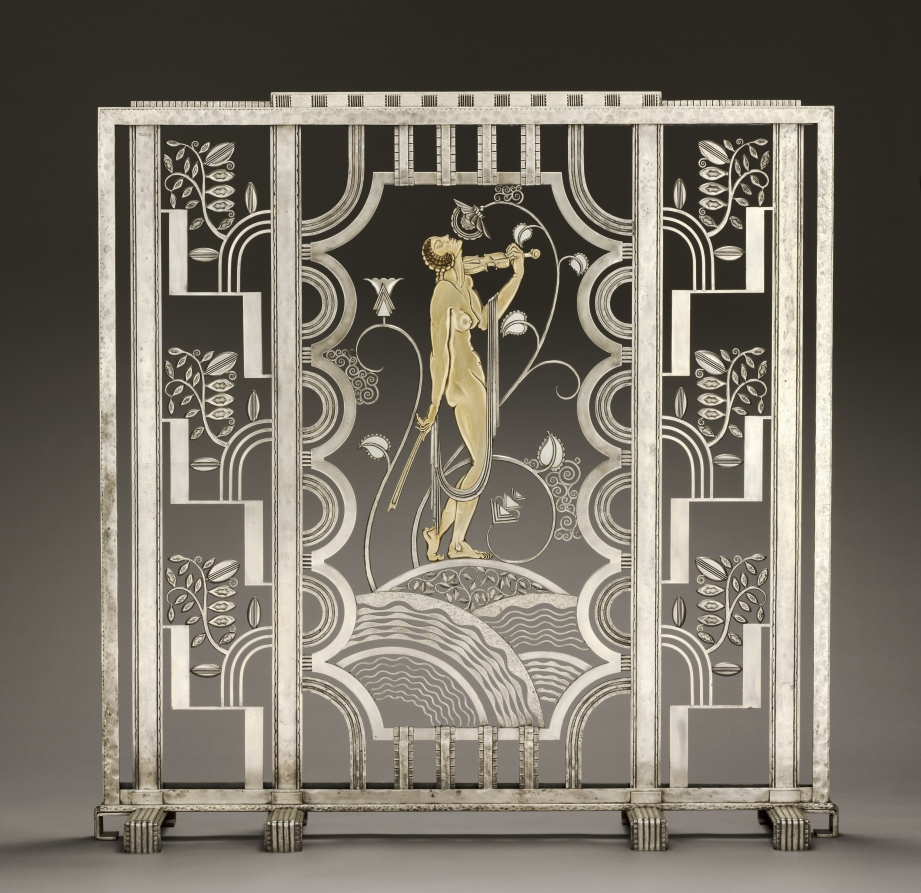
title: Muse with Violin Screen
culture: America, Ohio, Cleveland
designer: Paul Fehér (American, born Hungary, 1898–1990)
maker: Rose Iron Works (America, Ohio, Cleveland, est. 1904)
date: 1930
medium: Steel, brass; silver and gold plating, cotton velveteen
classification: Metalwork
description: Since the early years of the 20th century, the Rose Iron Works, a Cleveland supplier of architectural ornament, has produced distinguished metalwork. The company’s founder, Martin Rose, was born in Austria-Hungary and studied ornamental metalsmithing in Vienna prior to immigrating to Cleveland in 1902. In the 1920s, he hired a talented young Parisian designer, Paul Fehér, to work for the firm. Fehér’s designs, culminating in this massive screen, brought a modern European sensibility to the Rose Iron Works production. With its geometric patterning, highly stylized and abstracted natural forms, and the central figure reminiscent of the celebrated jazz singer Josephine Baker, this screen reflects the classic motifs of Art Deco design.